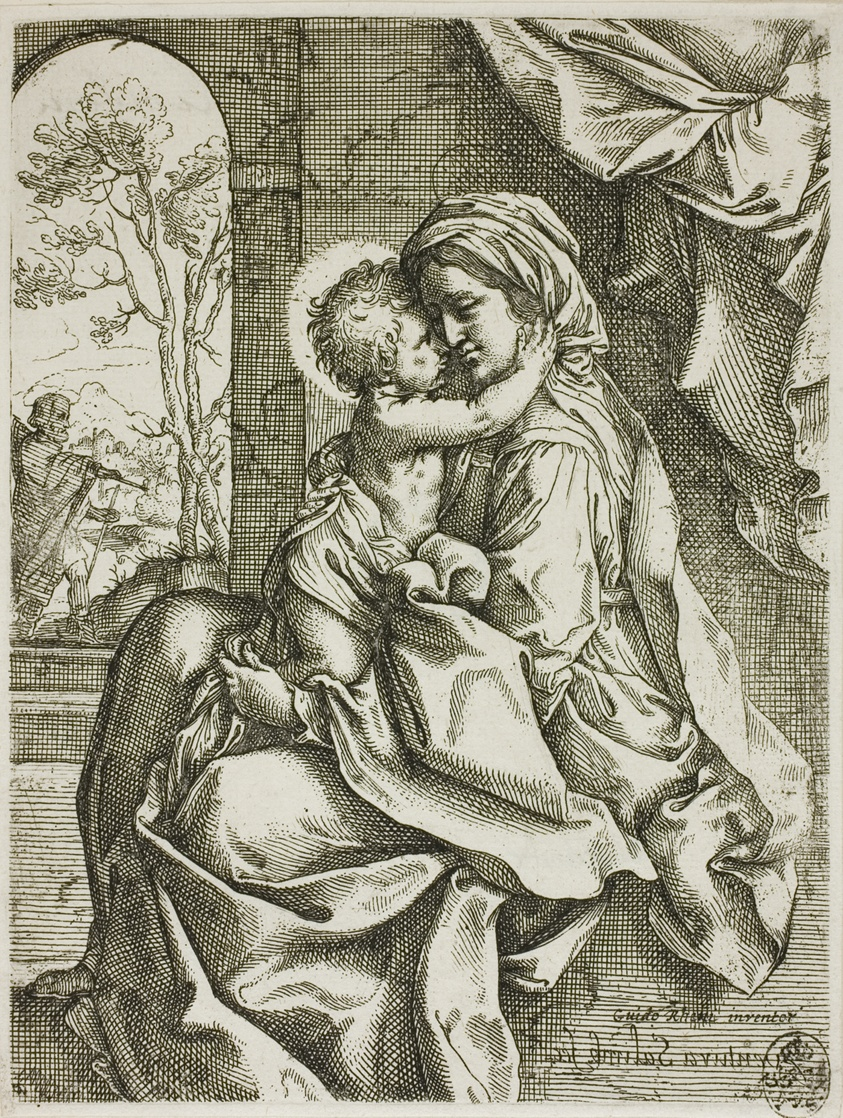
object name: Print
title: Madonna and Child with Saint Joseph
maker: Attributed to Ventura Salimbeni (Italian, 1568-1613); after Guido Reni (Italian, 1575-1642)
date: before 1613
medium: Etching in black on ivory laid paper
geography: Italy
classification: etching; print; prints and drawing